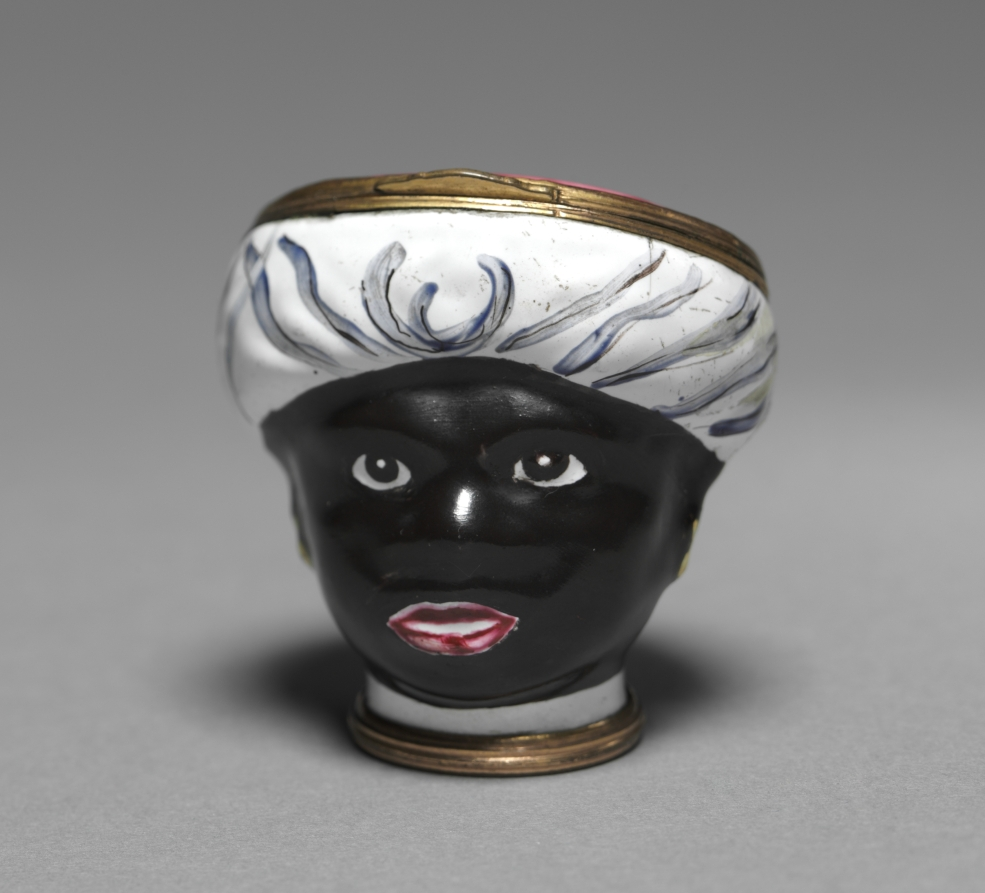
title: Bonbonniere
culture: England, Staffordshire, 18th century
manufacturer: Staffordshire Factory (British)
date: 1700s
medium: enamel on copper with metal mounts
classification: Miscellaneous